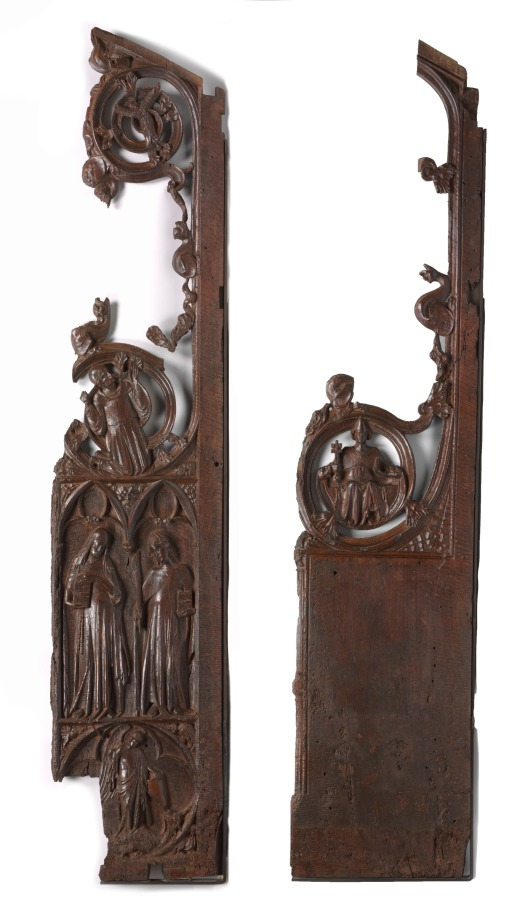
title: Pair of Panels from a Choir Stall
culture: Spain, Catalonia, Monastery of Pedralbes, 14th century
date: c. 1330–1340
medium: walnut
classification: Furniture and woodwork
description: The two larger panels-shown here in a fanciful arrangement-were probably the end panels of two stalls that faced each other across the choir of a Gothic church. The third and smaller panel originated from an interior portion of one of these stalls. The first large panel is carved with the figure of St. Francis of Assisi kneeling in prayer and receiving the stigmata. Two standing figures also appear on this panel: a nun at the left (perhaps St. Claire) and a female martyr at the right. Below is St. Michael and the dragon. The second large panel depicts a seated pope, possibly Urban IV, who holds the keys of St. Peter and a book. The small panel shows a female figure in a long gown standing on a plinth above two of the apocalyptic beasts, the winged lion of St. Mark and the winged ox of St. Luke, which are supported by a wyvern (a heraldic winged dragon). Both sides of this interior panel are intended to receive the missing seats.